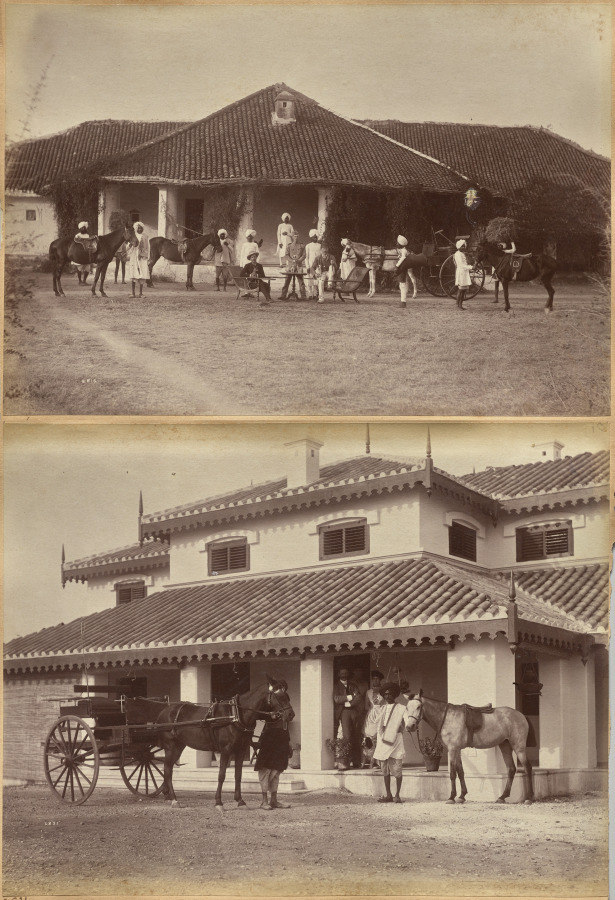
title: Dr. Morris and party, Jhansi (recto); Mr. MacNull, Jhansi (verso)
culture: India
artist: Raja Deen Dayal (Indian, 1844–1905)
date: c. 1882–87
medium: albumen print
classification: Photograph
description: These photographs are part of an album, now disassembled, of around 105 photographs taken in India between 1885 and summer 1887 that provide glimpses into the lives of the British colonial elite and royal and upper-class Indians. The museum holds another group of 37 pictures from this album (2016.266), which was probably commissioned by a British civil servant visiting or working in India around 1888 as a personal souvenir of his experiences there.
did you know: Raja Deen Dayal is regarded now, and was considered during his lifetime, to be India’s most important 19th-century photographer.